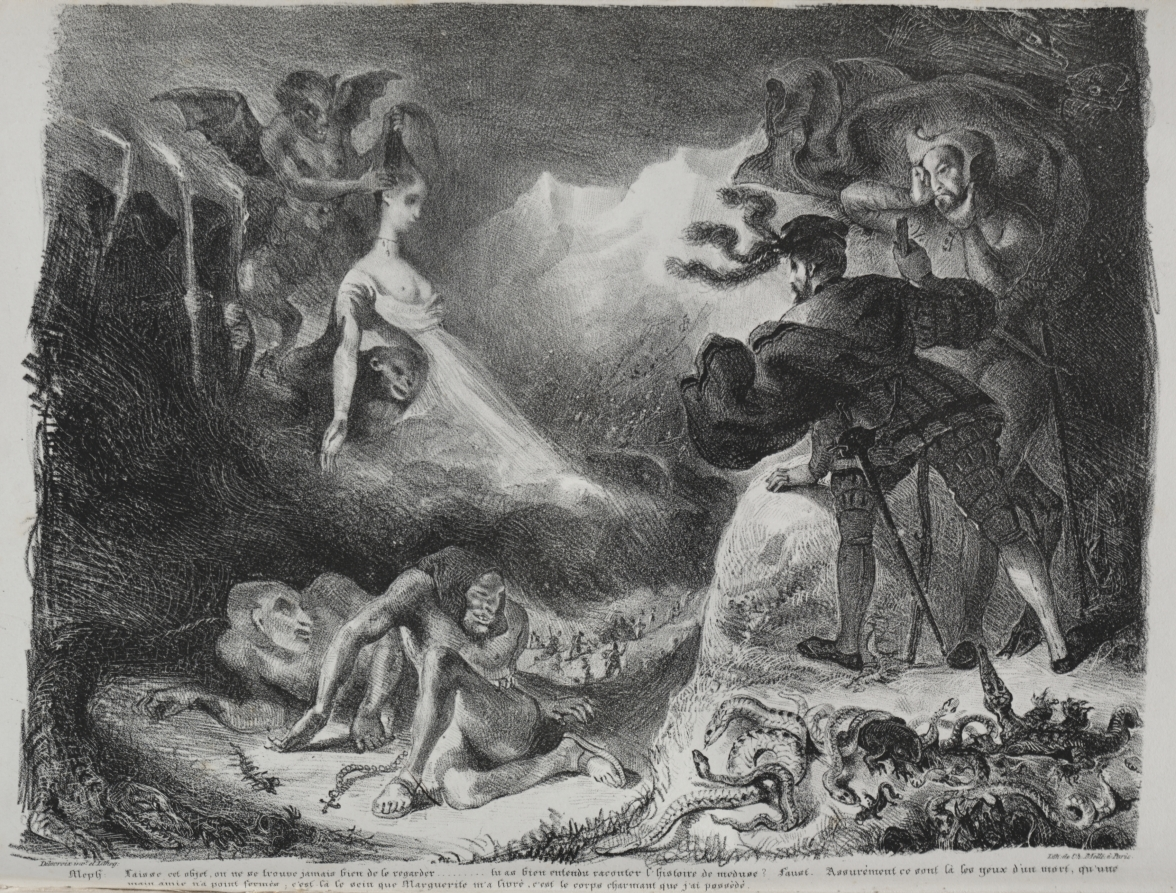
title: Illustrations for Faust: Marguerite's shadow appears to Faust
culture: France, 19th century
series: Faust: Tragédie de M. de Goethe, translated into French by Albert Stapfer.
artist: Eugène Delacroix (French, 1798–1863)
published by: Chez Ch. Motte, Éditeur, distributed by Chez Sautelet, Libraire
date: 1828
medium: lithograph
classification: Print